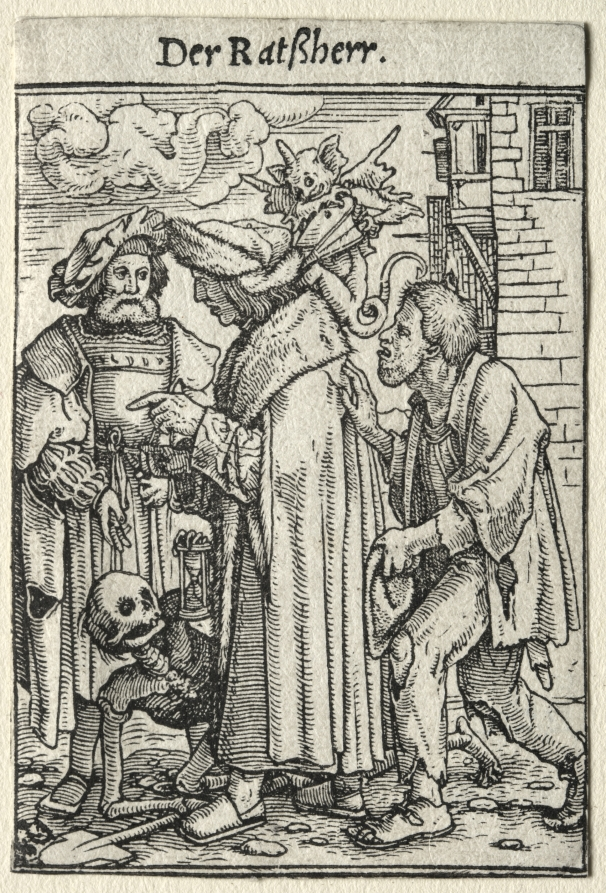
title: Dance of Death: The Councillor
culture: Germany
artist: Hans Holbein the Younger (German, active England and Switzerland, 1497/98–1543)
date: c. 1526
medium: woodcut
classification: Print